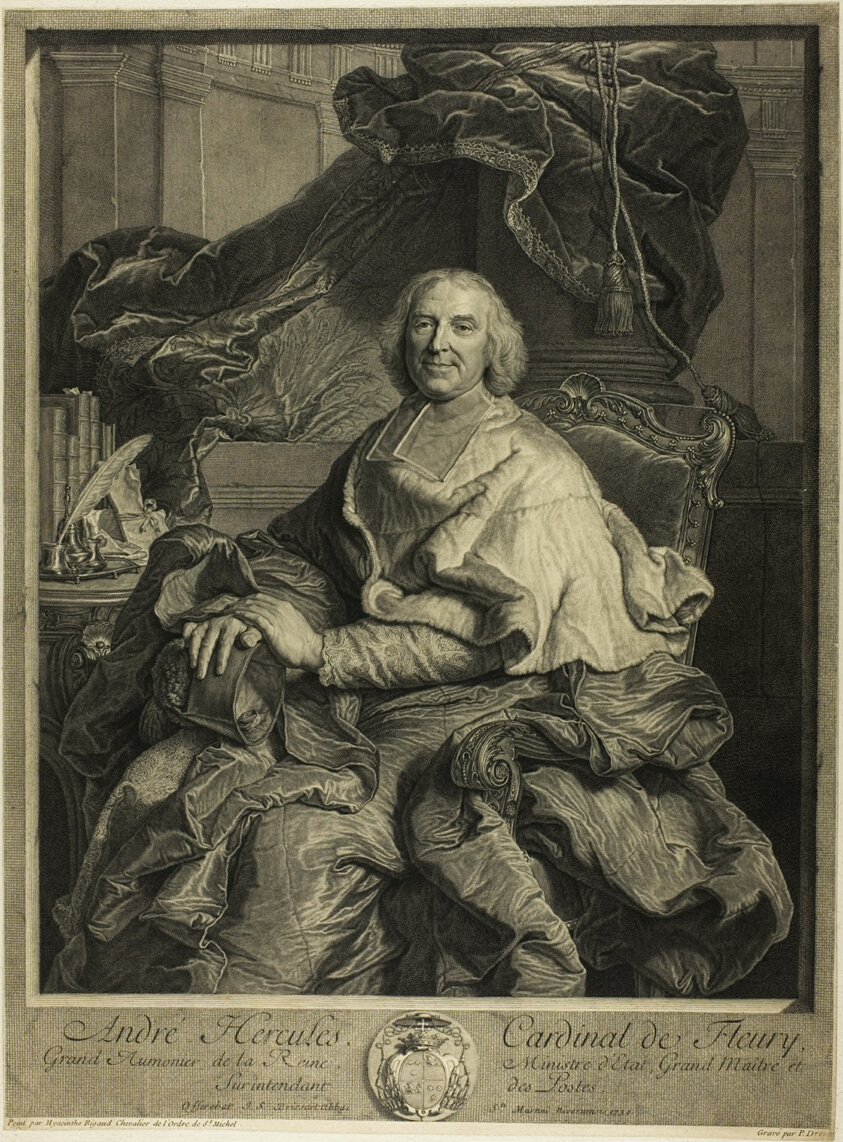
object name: Print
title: Portrait of Cardinal de Fleury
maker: Pierre Drevet (French, 1663-1738) and Pierre-Imbert Drevet (French, 1697-1739); after Hyacinthe Rigaud (French, 1659-1743)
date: 1730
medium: Engraving on cream laid paper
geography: France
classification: engraving; print; prints and drawing